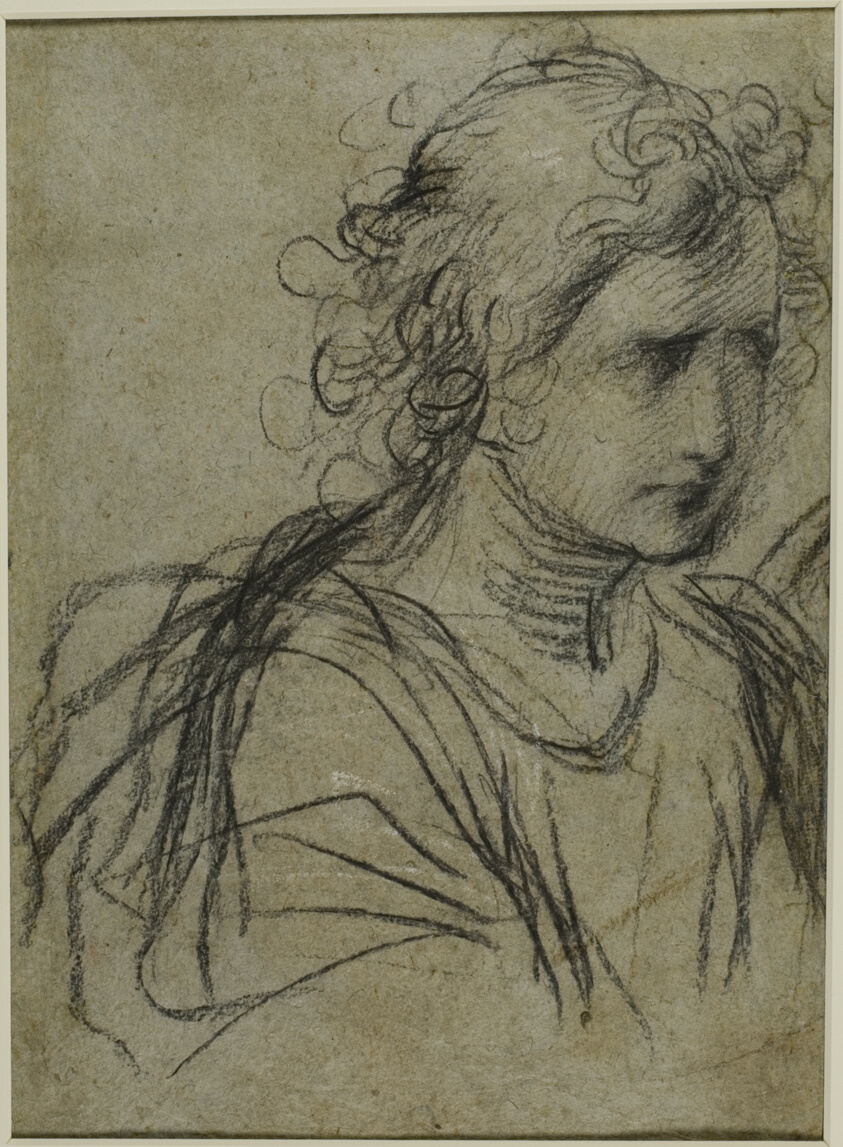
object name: Drawing and Watercolor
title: Half-Length View of Female in Profile to Left (recto); Half-Length view of Figure in Three-Quarter Profile (verso)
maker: Attributed to Jacopo Confortini (Italian, 1602-1672); or an unknown Italian artist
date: 17th century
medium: Charcoal, heightened with touches of white chalk (recto and verso), on blue-brown laid paper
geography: Italy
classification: chalk; drawings (visual works); prints and drawing